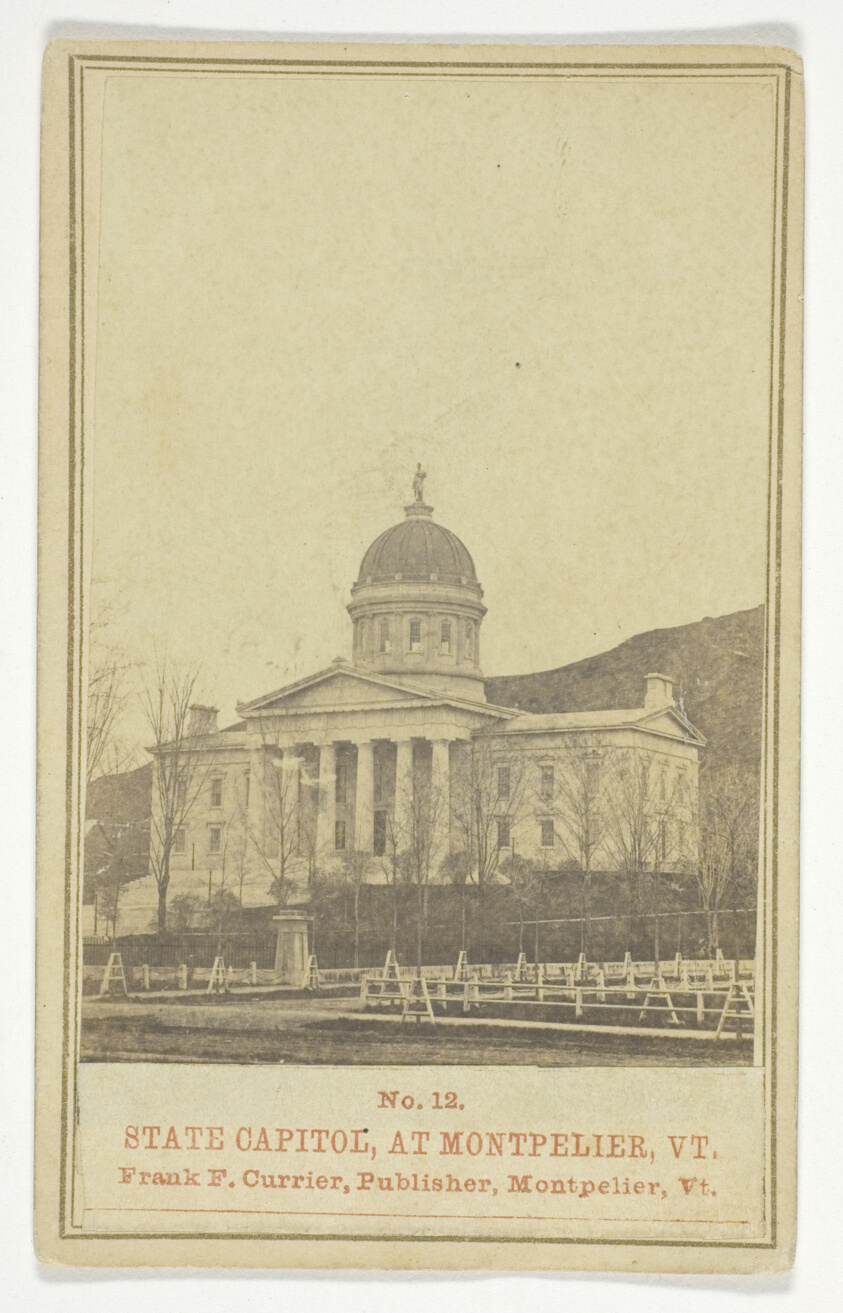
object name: Photograph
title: State Capitol at Montpelier, VT.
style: 19th century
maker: George Watson (American, 19th century)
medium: Albumen print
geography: United States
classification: photographic process; photography; card photographs; photograph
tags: Collected by Hugh Edwards